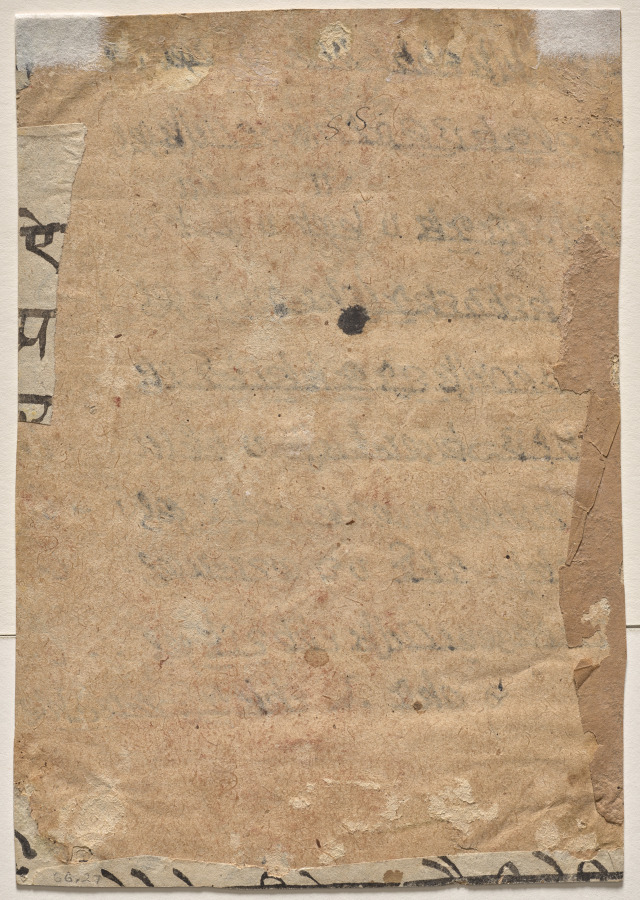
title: Man Dhata in Yogi Position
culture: India, Pahari, Nurpur, late 17th Century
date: c. 1690–1700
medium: Gum tempera and ink on paper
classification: Painting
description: An unconventional ruler portrait depicts Raja Mandhata of Nurpur (reigned 1661/1667–1700) engaged in yogic practice, raising his breath to pierce the three knots (ghranti) of the subtle body. The knots, which are located at the base of the spine, the heart, and between the eyebrows, are identified, respectively, with the deities Brahma, Vishnu, and Rudra (Shiva). This rare image of the ghranti points to the key role that kings played in creating yoga’s visual culture.